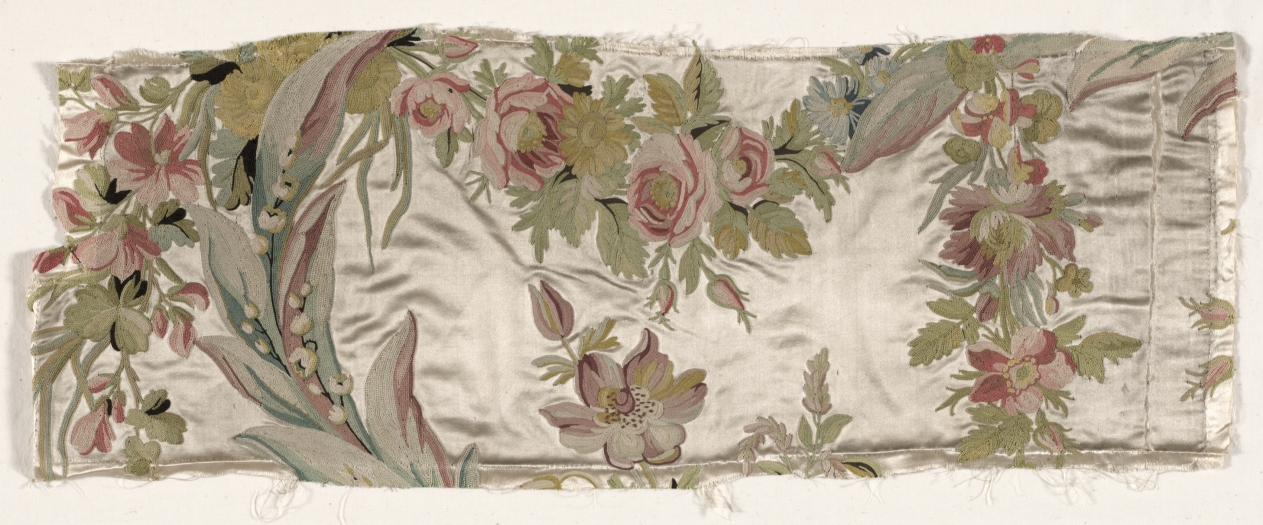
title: Coverlet Fragment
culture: France, 18th Century, period of Louis XVI (1774-1793)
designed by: Philippe de Lasalle (French, 1723–1805)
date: c. 1760–1770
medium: embroidered satin and silk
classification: Textile